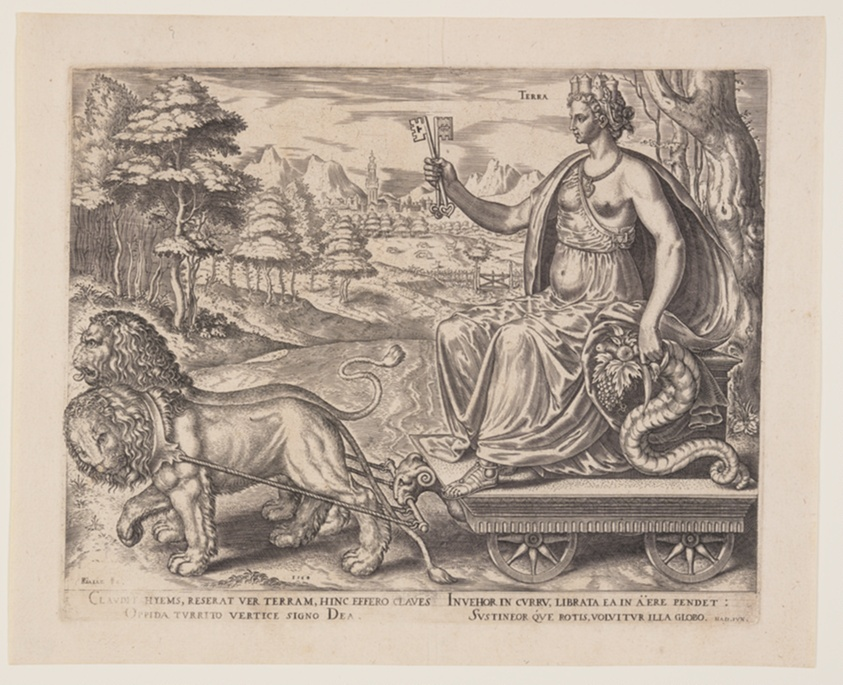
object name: Print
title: Earth, from The Four Elements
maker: Philip Galle; Flemish, 1537–1612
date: 1564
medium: Engraving on ivory laid paper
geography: Flanders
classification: engraving; paper; print; prints and drawing